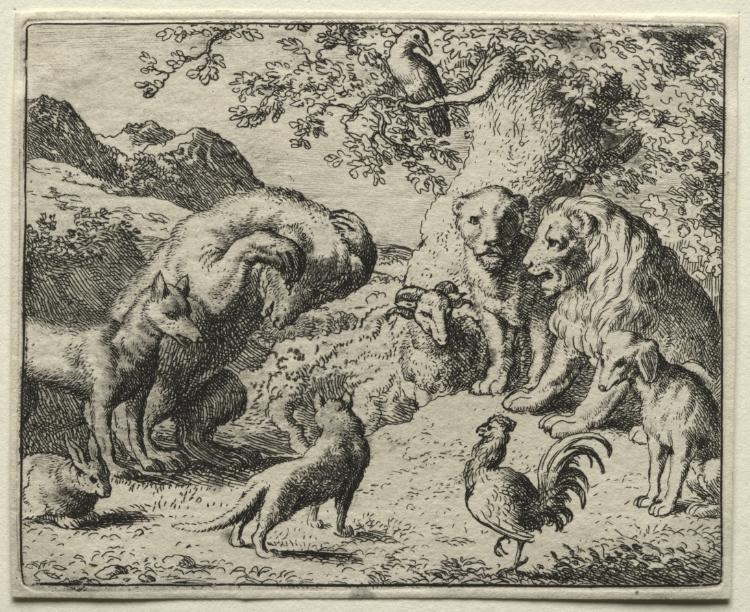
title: Reynard the Fox: The Complaint of the Bear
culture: Netherlands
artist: Allart van Everdingen (Dutch, 1621–1675)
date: 1650–75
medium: etching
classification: Print